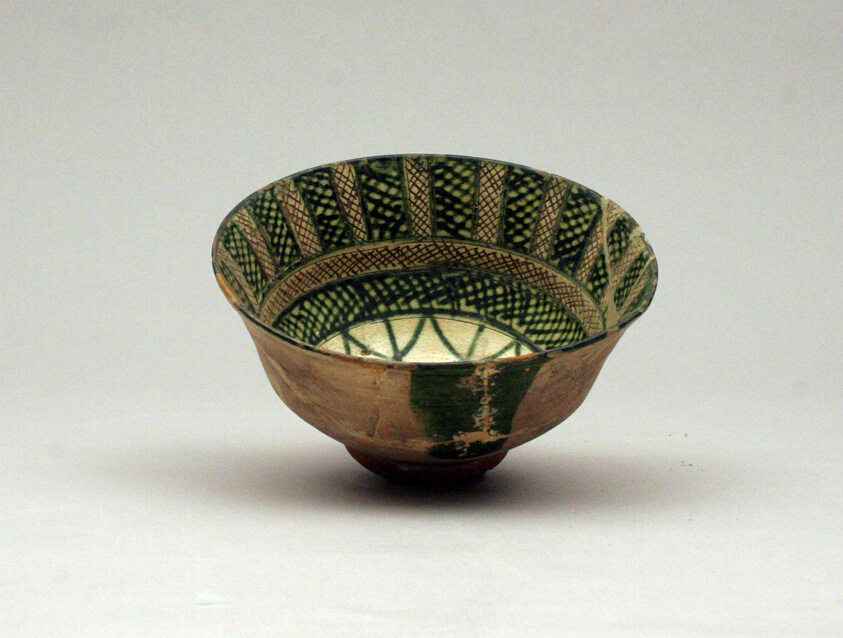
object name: Ceramics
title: Bowl with Incised Decoration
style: amol, abbasid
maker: Iran; Probably Amol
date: 12th/13th century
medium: Earthenware with incised decorations and polychrome painting under transparent glaze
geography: Iran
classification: earthenware; asian art; ceramics; decorative arts